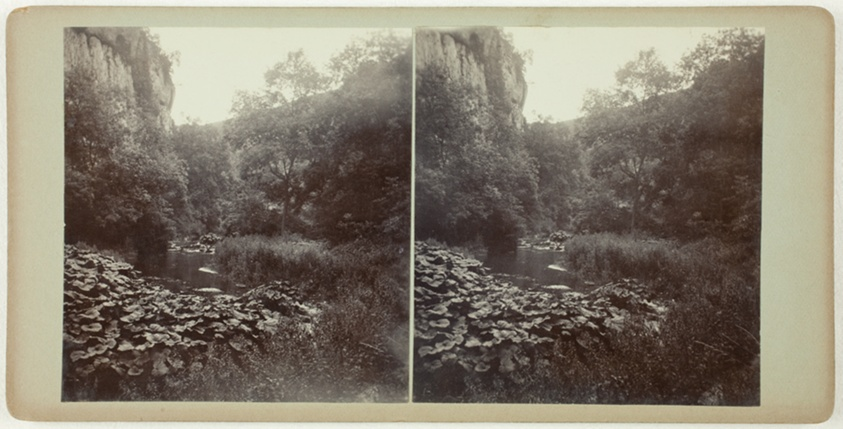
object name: Photograph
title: Untitled (Miller's Dale)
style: 19th century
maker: Artist unknown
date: 1860s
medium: Albumen print, stereo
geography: Derbyshire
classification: photograph; albumen silver print; photography